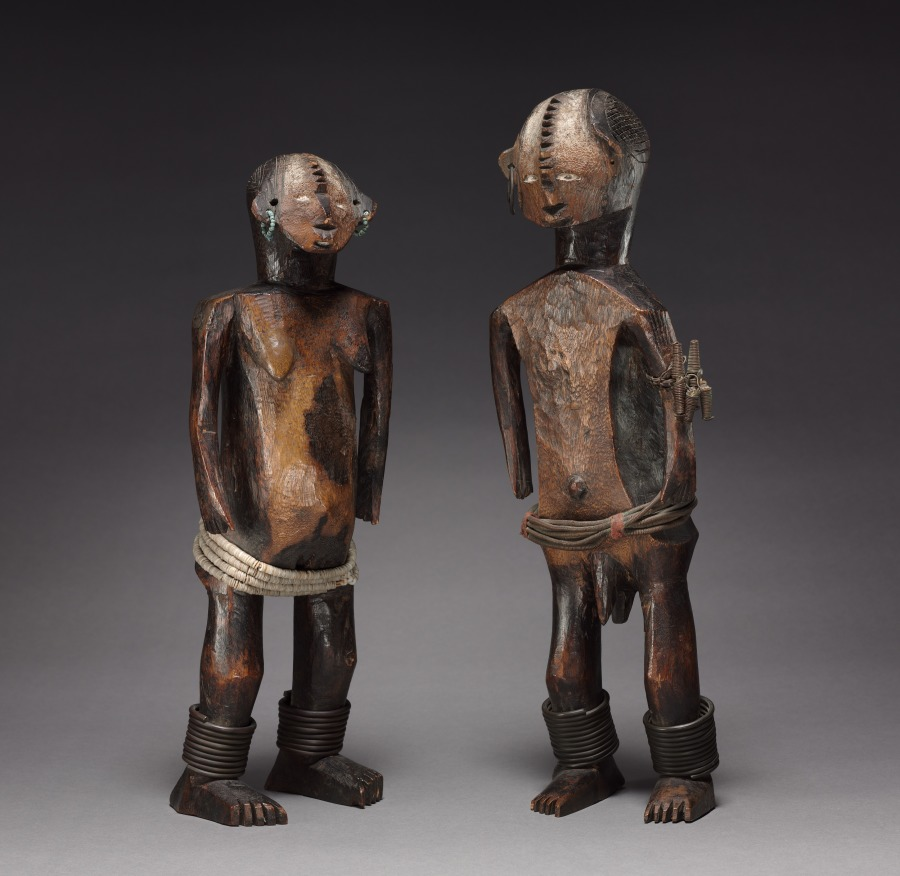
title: Pair of Figures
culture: Africa, Central Africa, Democratic Republic of Congo, probably Ngbandi-style carver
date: late 1800s-early 1900s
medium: Wood, iron alloy, copper alloy, glass beads, plant fiber, and cloth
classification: Sculpture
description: Carving of paired figures is quite well documented among the Ngbandi and its neighbors the Ngbaka-Minagende, where such sculptures are said to represent the mythical ancestor Seto and his sister-wife, Nabo. Field-based research cannot confirm the existence of figurative couples among the Ngbandi.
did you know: Odette Delenne, the collector of this pair, once stated that these figures reminded her of herself and her husband, René.